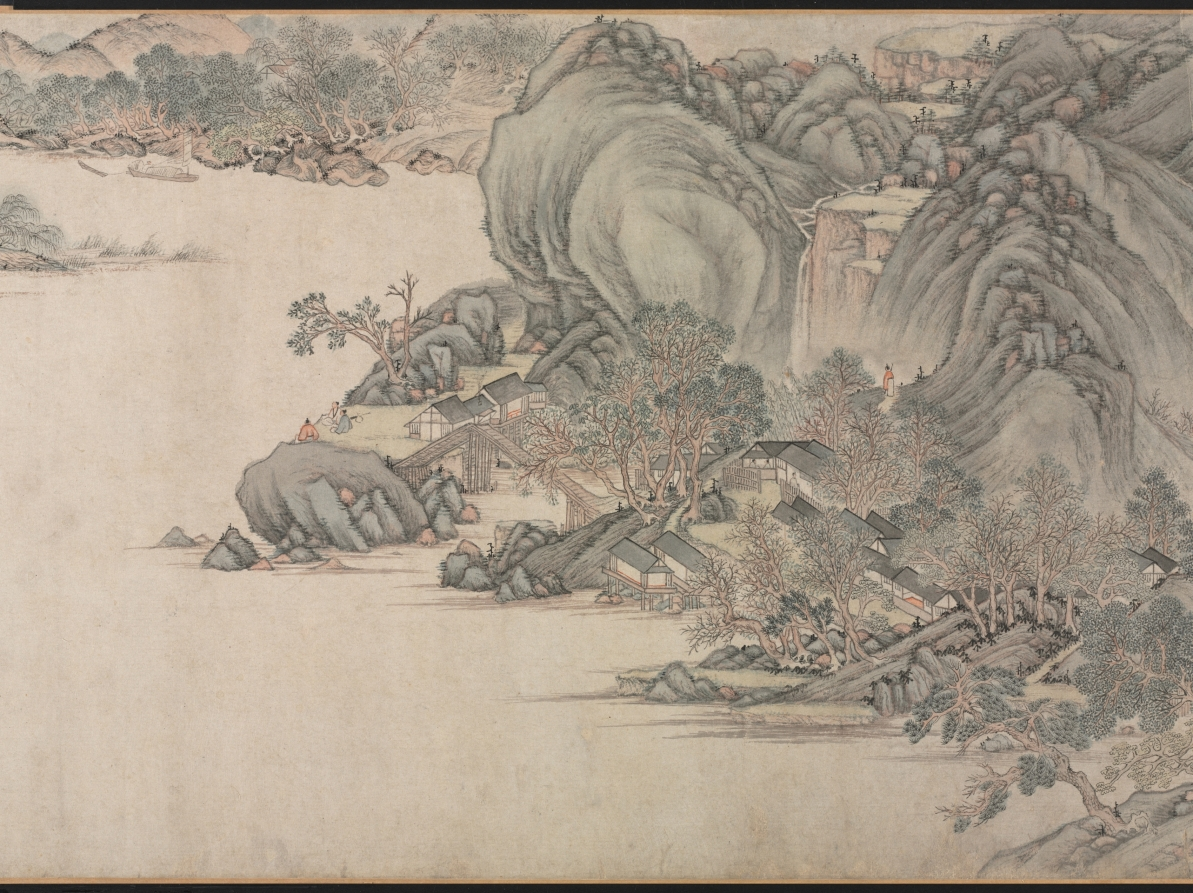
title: Greeting the Spring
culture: China, Ming dynasty (1368–1644)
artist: Wu Bin (Chinese, active c. 1591–1626)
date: 1600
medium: handscroll; ink and light color on paper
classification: Painting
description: This masterfully composed landscape in light colors and delicate brushwork is an image of the water-rich Jiangnan region in southeast China, where Wu Bin was active as an artist. Embedded in rolling hills along lakesides and streams nestle cityscapes hosting numerous spring festivities. Lantern displays and street performances in the villages salute the New Year, and are interwoven with scenes of farming, fishing, and silk making. In one scene in the middle ground, an ox made of clay under a canopy is lead in a procession to an architectural compound, a ceremony known as whipping the spring ox in hope for a good harvest. This handscroll bears five collector seals by the Qianlong emperor indicating his appreciation for the painting.